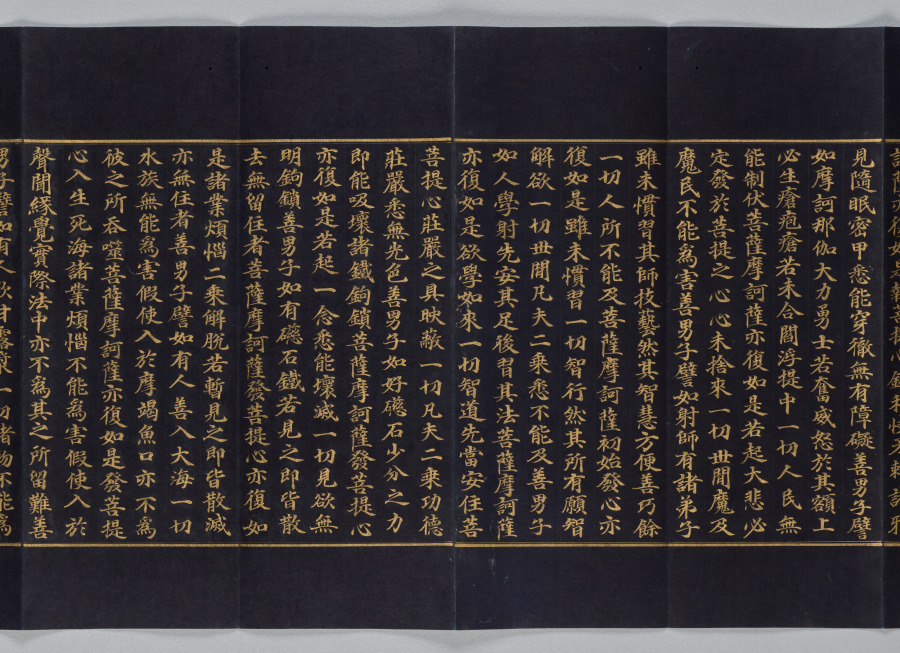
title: Avatamsaka Sutra No. 78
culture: Korea, Goryeo dynasty (918–1392)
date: 1300s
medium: Folded book with illustrated frontispiece; gold and silver on mulberry paper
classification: Bound Volume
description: This illuminated manuscript presents one part of the multivolume sacred text titled Avatamsaka (Flower Garland) sutra. Both the script and the image are rendered in gold ink on the smooth surface of the dark blue, indigo-dyed mulberry paper. This portion of the text, which reads from right to left, describes the encounter of the Buddha of the Future (Maitreya) and the young pilgrim Sudhana. The Buddha gives his words of wisdom to Sudhana, who asks questions about the path toward spiritual awakening. Mixed with ink and glue, the gold has a brilliance that strikingly reflects Sudhana’s ardent quest for understanding the way to reach enlightenment.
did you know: The pristine condition of this manuscript indicates that it was rarely used after its creation, revealing that the act of making a manuscript rather than reading it was the main religious goal.